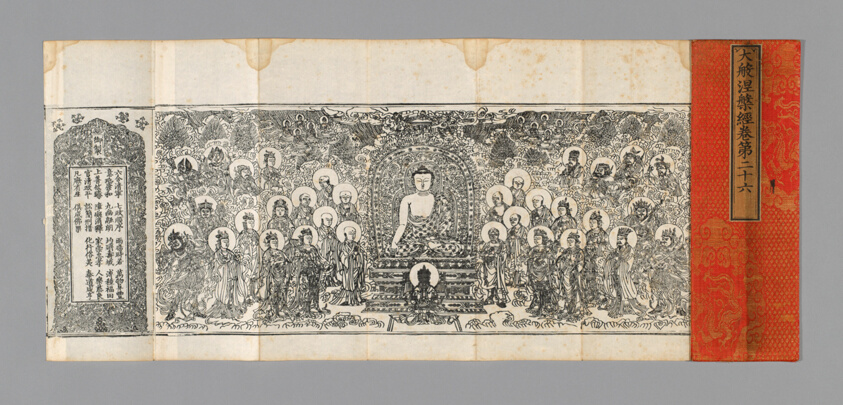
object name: Textile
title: Sutra Cover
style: ming, Chinese (culture or style), East Asian, asian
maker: China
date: Ming dynasty (1368–1644), c. 1590's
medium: Silk and gold-leaf-over-lacquered-paper strips, satin weave with patterning wefts; wrapped over cardboard and backed with paper; applied label of silk, plain weave; with inscribed title painted and/or printed with ink; sutra, accordion mounted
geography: China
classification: textile; weaving